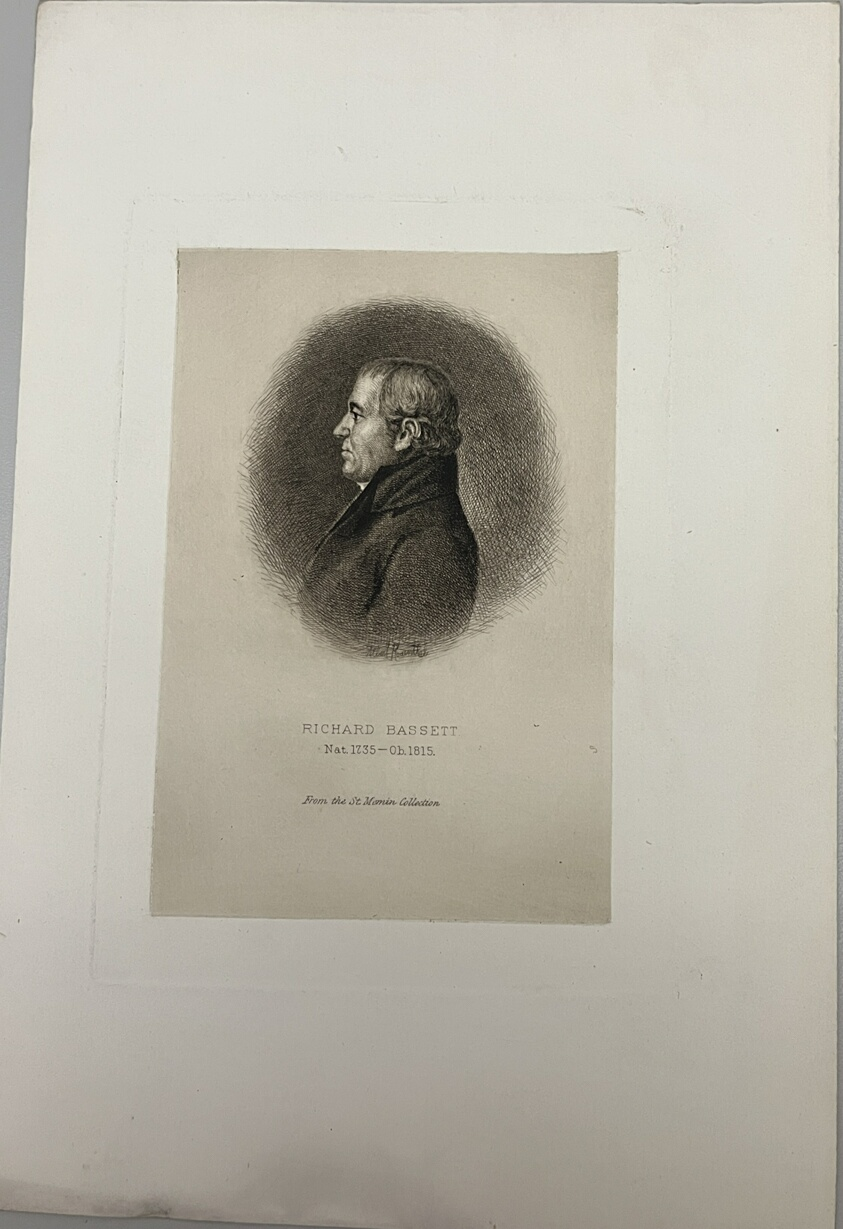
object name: Print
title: Richard Bassett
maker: Albert Rosenthal (American, 1863-1939)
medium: Etching on paper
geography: United States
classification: reproduction; print; prints and drawing